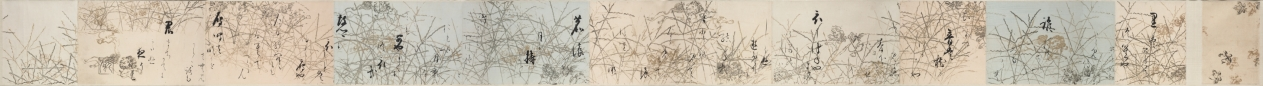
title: Selections from the New Collection of Japanese Poems from Ancient and Modern Times (Shinkokin wakashū) with Printed Designs of Chinese Lions and Crab Finger Grass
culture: Japan, Edo period (1615–1868)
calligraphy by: Hon'ami Kōetsu (Japanese, 1558–1637)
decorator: Tawaraya Sōtatsu (Japanese, c. 1570–c. 1640)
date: early 1600s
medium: handscroll; ink, gold, and silver on paper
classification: Calligraphy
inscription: Seal: 光悦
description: Hon’ami Kōetsu was a calligrapher and craftsman who frequently collaborated with the painter Tawaraya Sōtatsu, considered the first master of the Rinpa school. Kōetsu brushed seven poems from the autumn section of a poetry anthology onto dyed paper with motifs designed and printed in gold and silver by Sōtatsu.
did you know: Before becoming a master painter of screens, Tawaraya Sōtatsu painted fans.